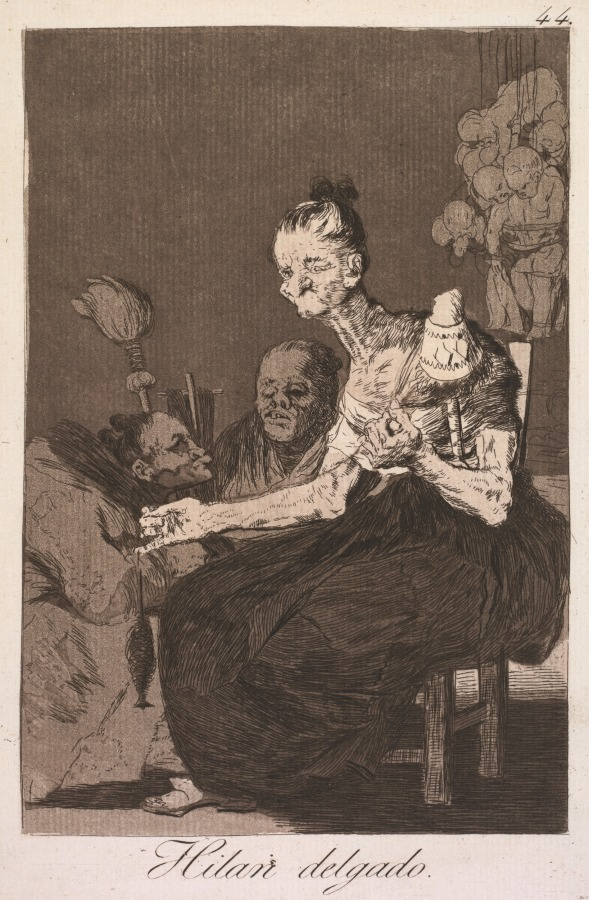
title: They Spin Finely, Plate 44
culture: Spain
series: Los Caprichos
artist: Francisco de Goya (Spanish, 1746–1828)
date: 1799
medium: Etching, aquatint, drypoint, and engraving printed in sepia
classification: Print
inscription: Lower left margin, in graphite: MK 30262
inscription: Engraved in plate: 44, upper right corner, and Hilan Delgado, below image, center.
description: Francisco de Goya creatively engaged with printmaking, producing bold and innovative compositions. This impression is a rare trial proof printed in sepia ink before publication of the series Los Caprichos, whose title translates as “caprices” or “artistic fantasies.” As one of the earliest sheets printed from the plate, it retains Goya’s subtle layers of tonal aquatint absent in later impressions. Note, for example, the slight shift in tone between the pale skin and white blouse of the woman in the foreground whose spinning, a common euphemism for sex work, is likely the subject of the artist’s elaborate critique.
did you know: Francisco de Goya gave each of the prints in Los Caprichos, including this one, intentionally cryptic titles.